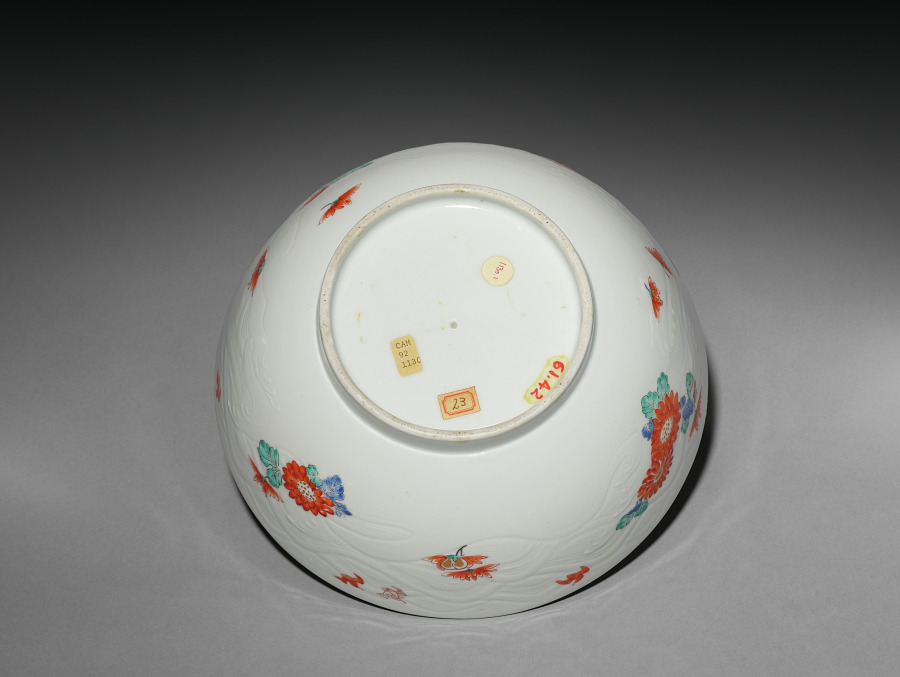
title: Covered Bowl with Chrysanthemums and Chidori: Kakiemon Ware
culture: Japan, Edo period (1615–1868)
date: early 1700s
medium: porcelain with decoration in colored enamels; molded design of waves on exterior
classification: Ceramic